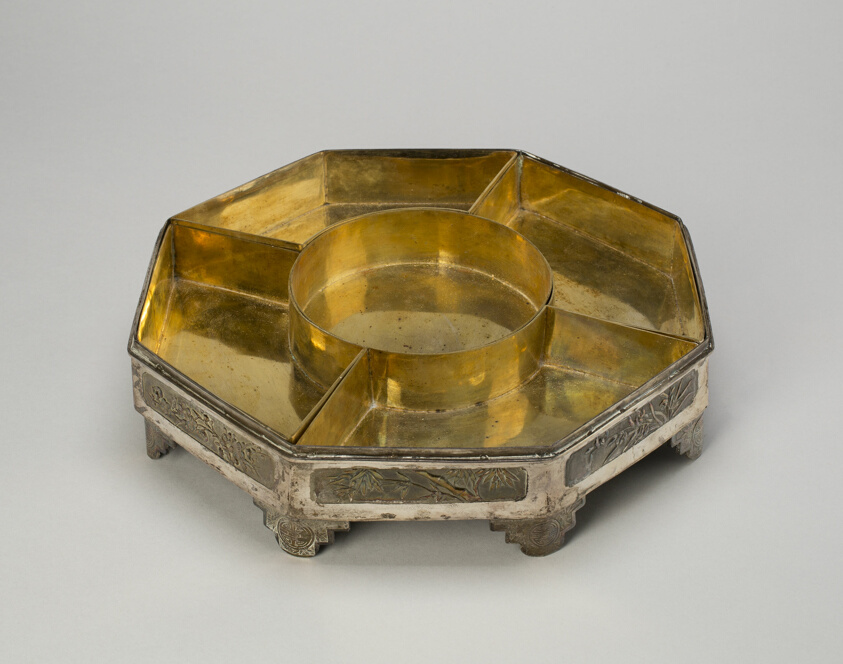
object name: Vessel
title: Hexagonal Covered Box with Birds and Flowers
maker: China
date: Qing dynasty (1644–1911), Kangxi reign mark and period (1662–1723)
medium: Silver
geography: China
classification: silver; metal; vessel; asian art